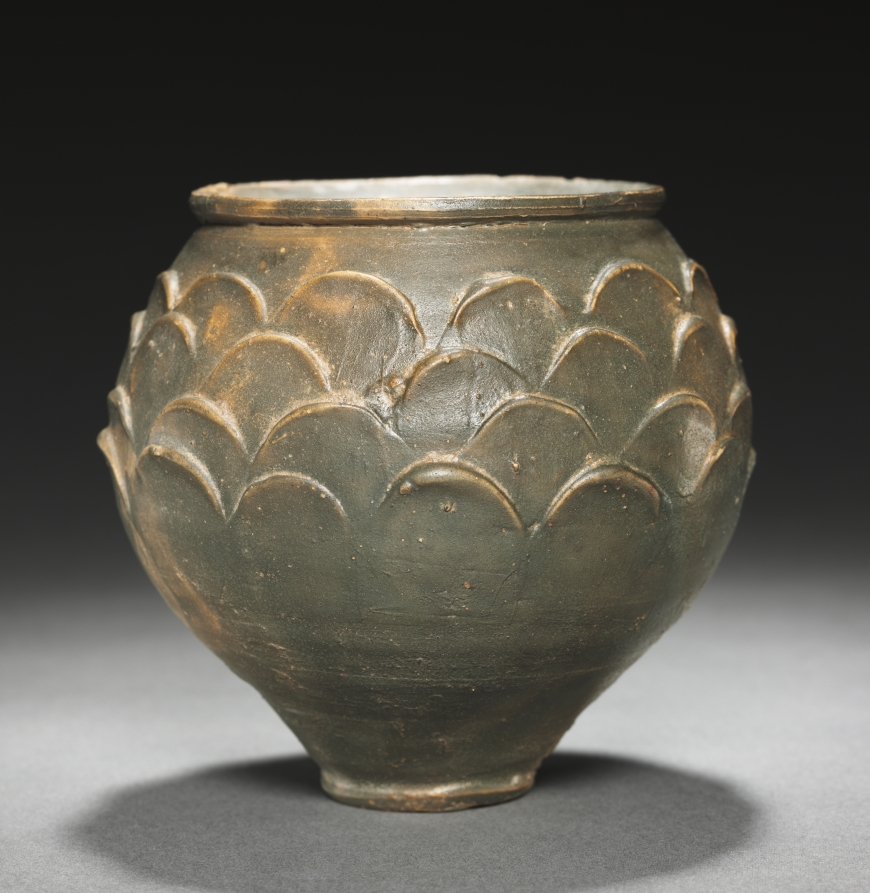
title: Beaker with Scale Pattern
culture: Rhenish (Cologne), Gallo-Roman, 1st Century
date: 1–100 CE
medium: reddish ware with dark gray burnished slip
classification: Ceramic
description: The dark brown glaze on the exterior of this beaker is patchy and irregular, allowing the light red clay beneath to show through. The glaze is especially light on the ridges of the raised scales that decorate the upper body of the vessel, arranged in four offset rows. The pattern was created by applying thick clay slip to the surface of the beaker after it was removed from the potter’s wheel.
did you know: Several textile fibers were found inside this beaker, suggesting that it may have contained an object or objects wrapped in cloth when it was buried.